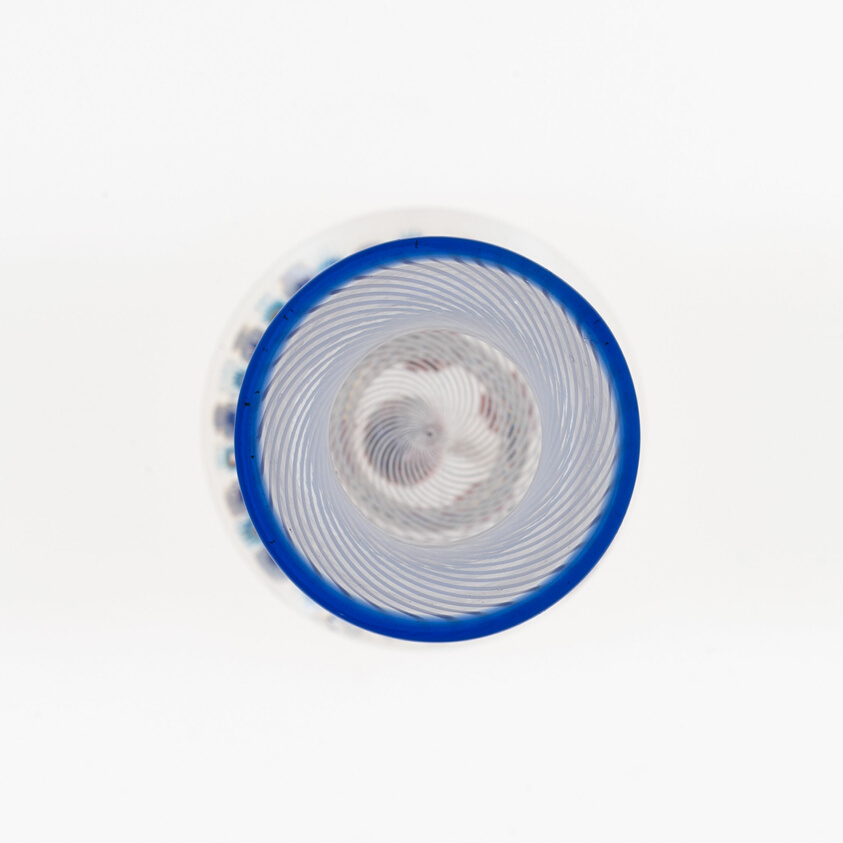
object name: Glass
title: Vase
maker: Saint-Louis Glassworks (Cristalleries de Saint-Louis); Lorraine, France, founded 1586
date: c. 1845–60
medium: Glass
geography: Saint-Louis-lès-Bitche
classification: paperweight; glass